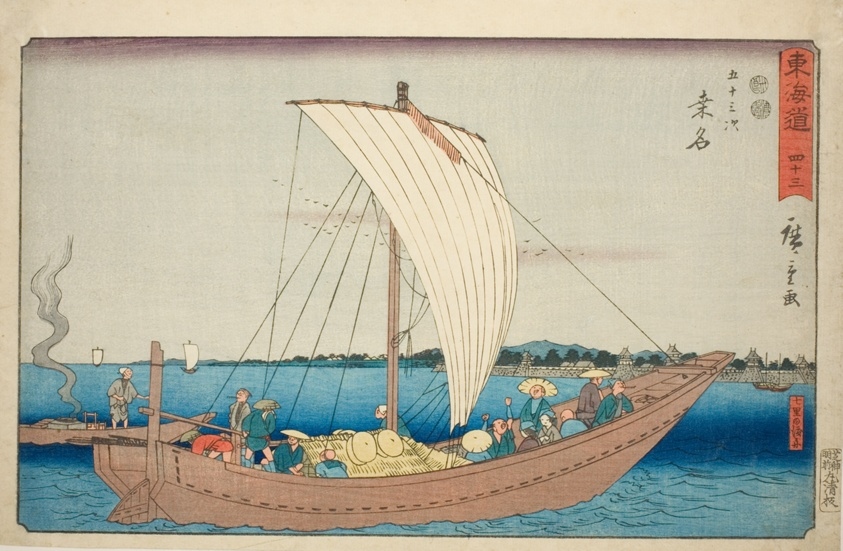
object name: Print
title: Kuwana: Ferryboat at Shichiri Crossing (Kuwana, Shichiri no watashibune)—No. 43, from the series "Fifty-three Stations of the Tokaido (Tokaido gojusan tsugi)," also known as the Reisho Tokaido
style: Japanese (culture or style)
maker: Utagawa Hiroshige 歌川 広重; Japanese, 1797-1858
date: c. 1847/52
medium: Color woodblcok print; oban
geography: Japan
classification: woodblock print; print; asian art